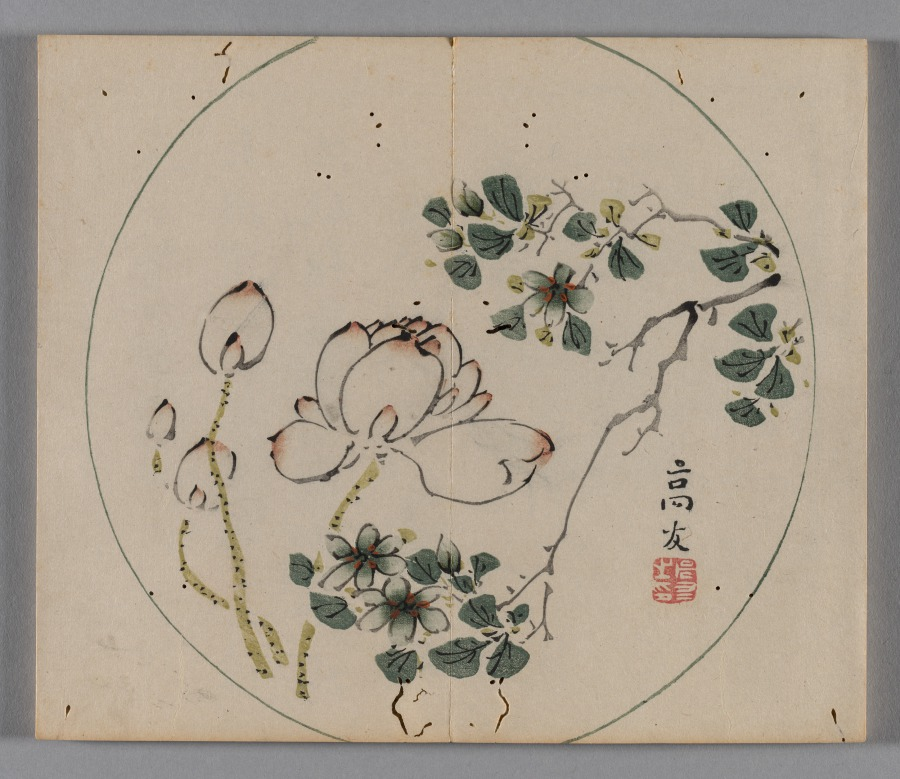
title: Ten Bamboo Studio Collection of Calligraphy and Painting: Round Fans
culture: China, Qing dynasty (1644-1911)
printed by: Hu Zhengyan (Chinese, c. 1584–1674)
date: 1633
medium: Woodblock-printed book; ink and colors on paper; first edition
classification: Print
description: Color printing reached a level of perfection in the early 1600s, as seen in this Ten Bamboo Studio Collection of Calligraphy and Painting and the Mustard Seed Garden Manual of Painting (printed 1679 and 1701). The painterly quality, precision in registering (aligning) the woodblocks, and harmonious colors made them the most successful color print editions in Chinese history. Both editions were printed and compiled in Nanjing, spread nationwide, and had a great impact on the arts in Japan and Korea.